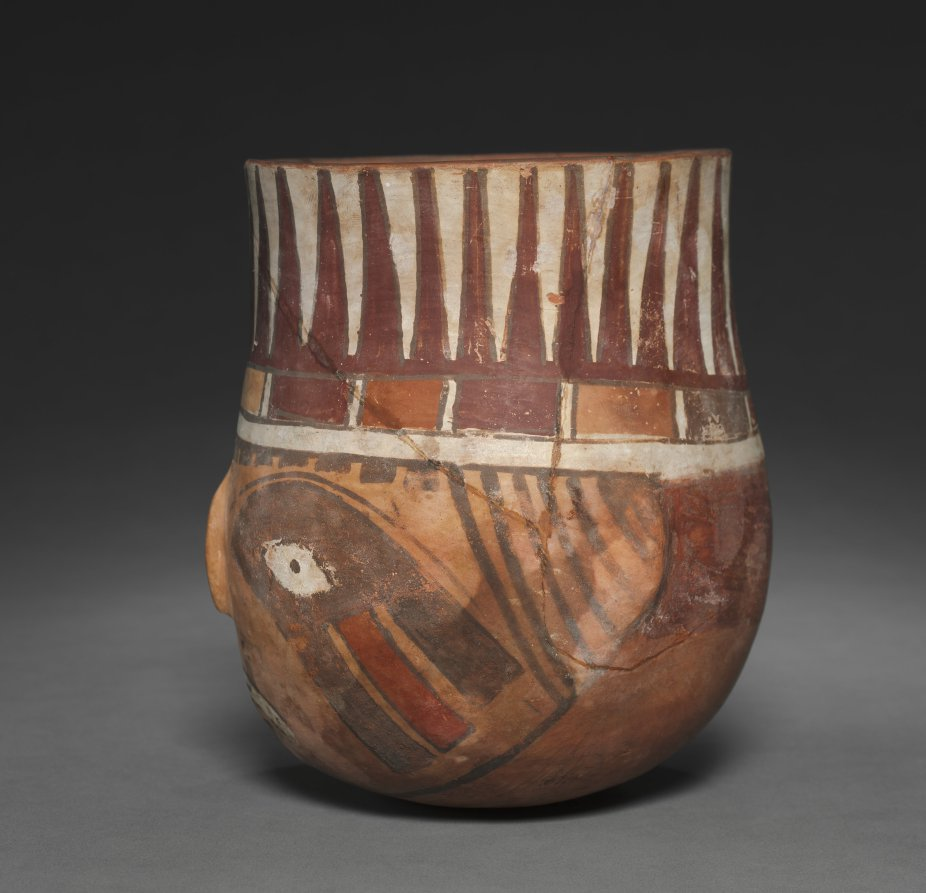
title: Vase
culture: Peru, South Coast, Nasca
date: c. 300–500 CE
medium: pottery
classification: Ceramic